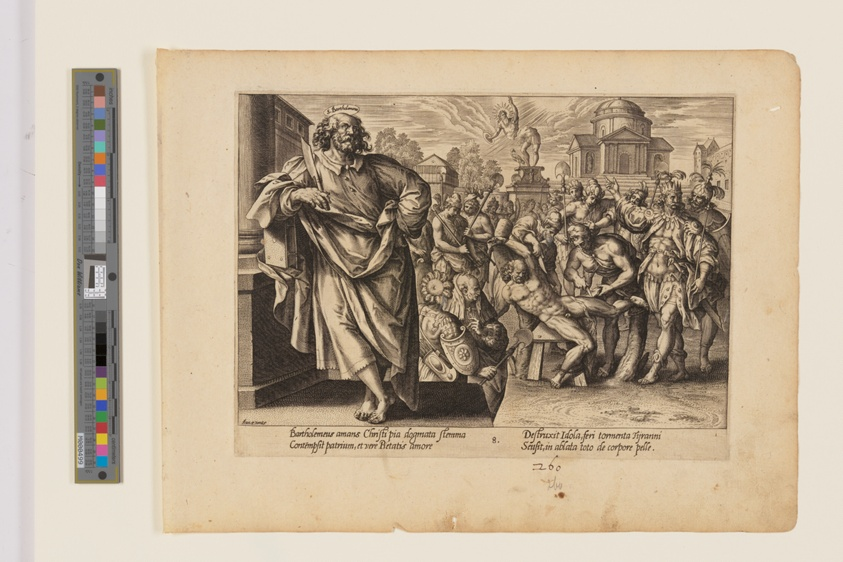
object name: Print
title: The Martyrdom of St Bartholomew, from The Martyrdom of Christ and the Apostles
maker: Hendrick Goltzius (Dutch, 1558–1617); after Maarten de Vos (Flemish, 1532–1603); published Hieronymus Cock (Netherlandish, c. 1510–1570)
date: c. 1578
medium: Engraving on ivory laid paper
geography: Netherlands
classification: engraving; paper; print; prints and drawing